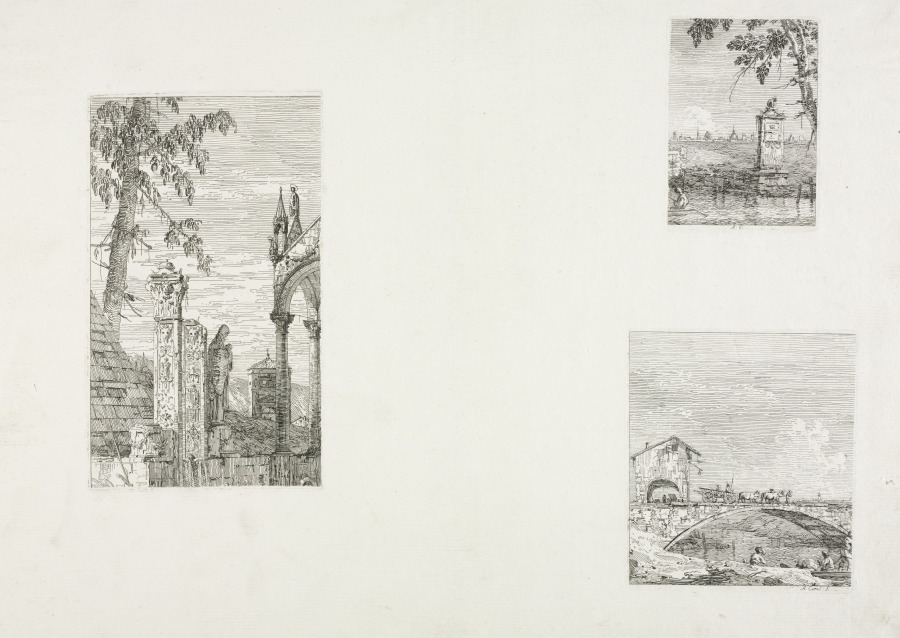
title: Views: A Wagon Passing over a Bridge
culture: Italy, Venice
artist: Antonio Canaletto (Italian, 1697–1768)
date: 1735–1746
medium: etching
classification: Print